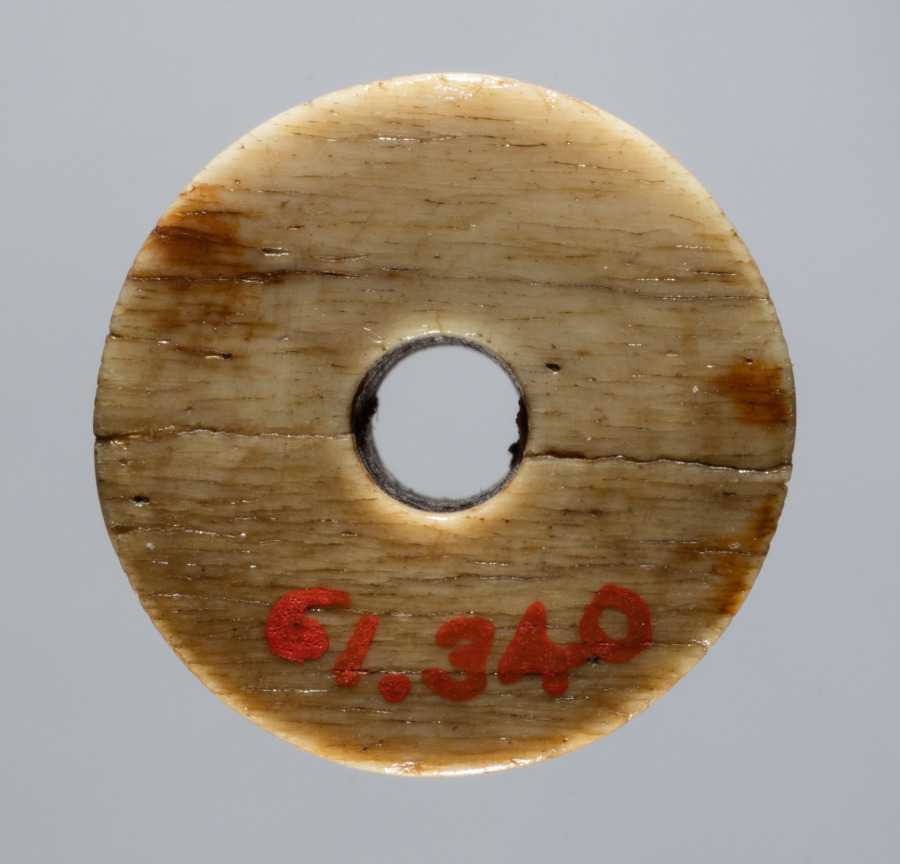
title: Spindle Whorl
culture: Iran, early Islamic period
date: 700s - 900s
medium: bone, incised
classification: Spindle Whorl